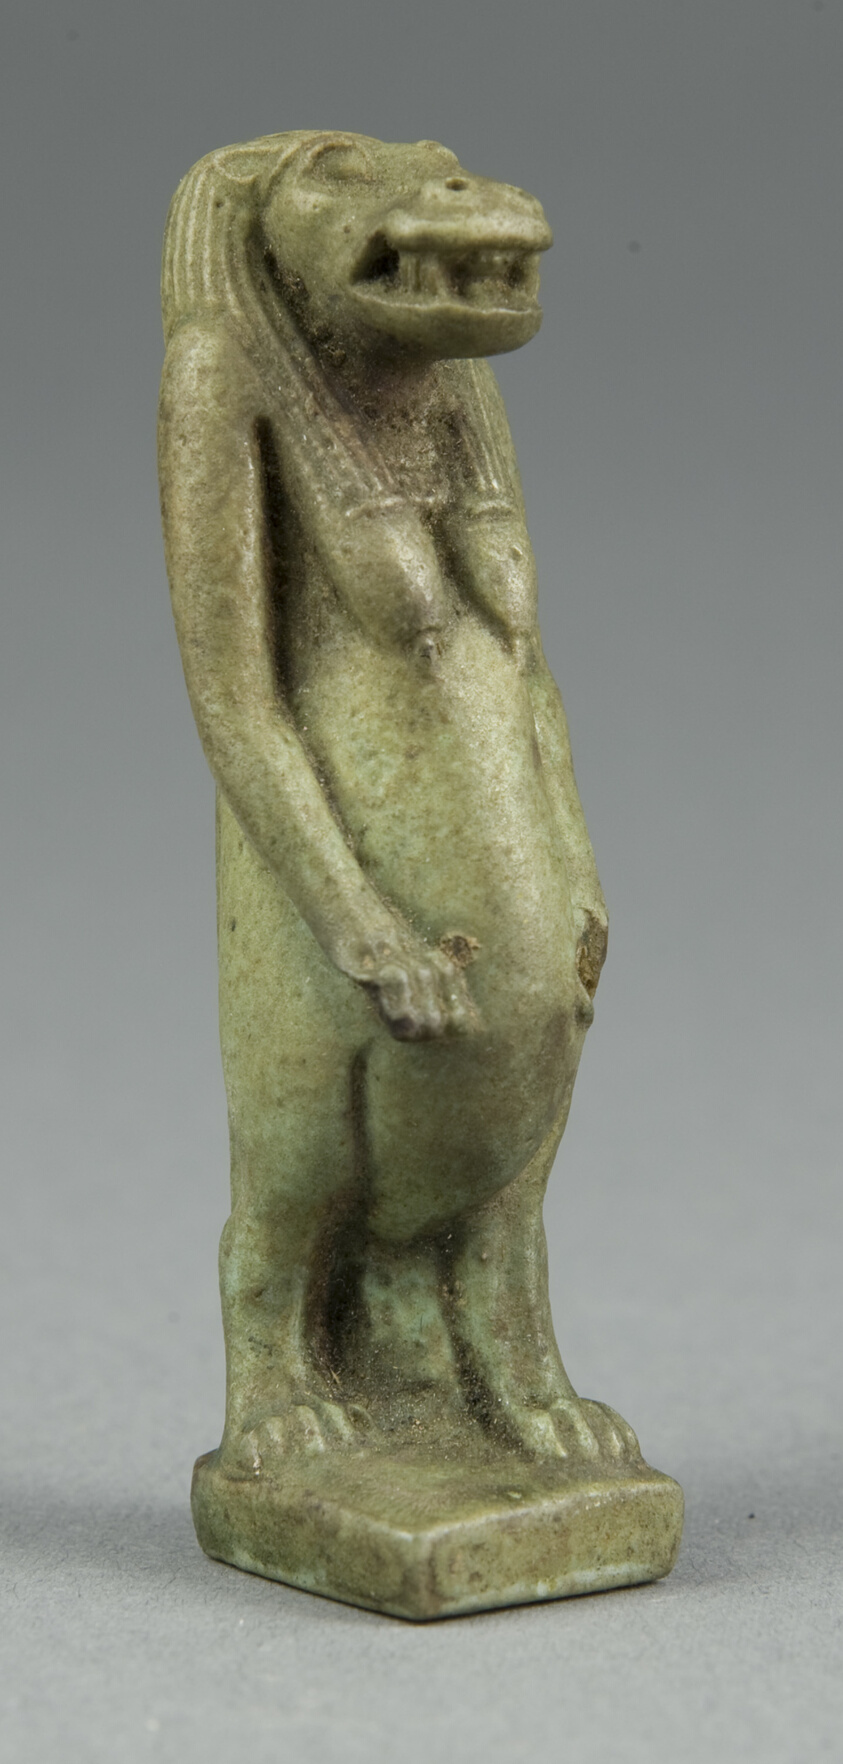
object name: Costume and Accessories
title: Amulet of the Goddess Tawaret (Toeris)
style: third intermediate period, egyptian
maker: Egyptian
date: Third Intermediate Period, Dynasty 21–25 (1070–656 BCE)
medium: Faience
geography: Egypt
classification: amulet; ceramics; jewelry; ancient art; costume; faïence (composite material)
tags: goddesses